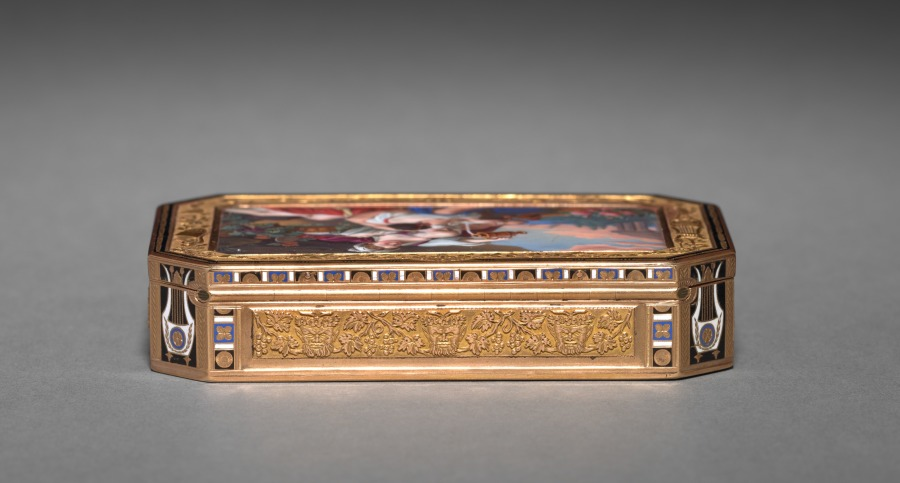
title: Box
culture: Switzerland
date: early 1800s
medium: gold and enamel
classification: Enamel